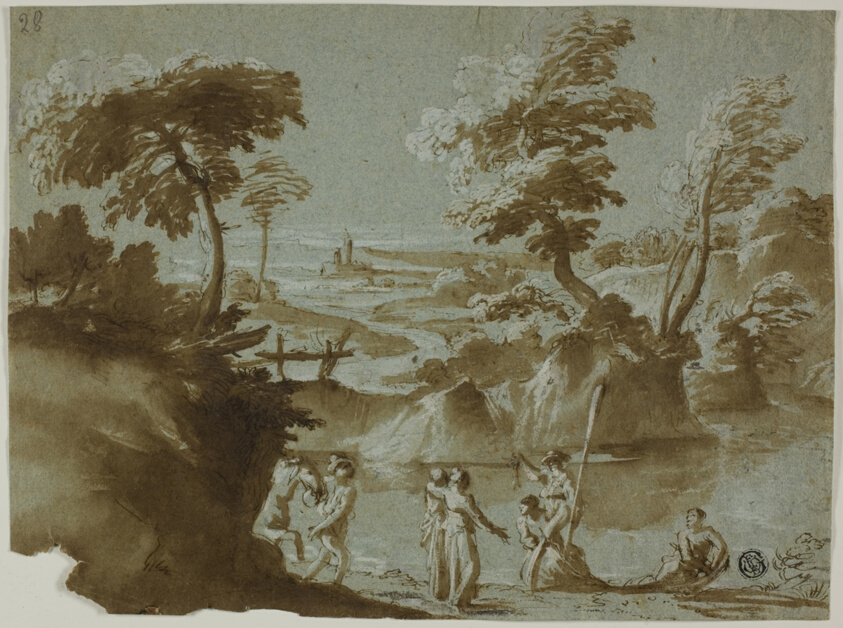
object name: Drawing and Watercolor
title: River Landscape with Boating Party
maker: Style of Alessio de Marchis (Italian, 1684-1752)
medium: Pen and brown ink, with brush and brown wash, heightened with lead white (discolored), on blue laid paper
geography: Italy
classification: ink or chalk wash; drawings (visual works); prints and drawing